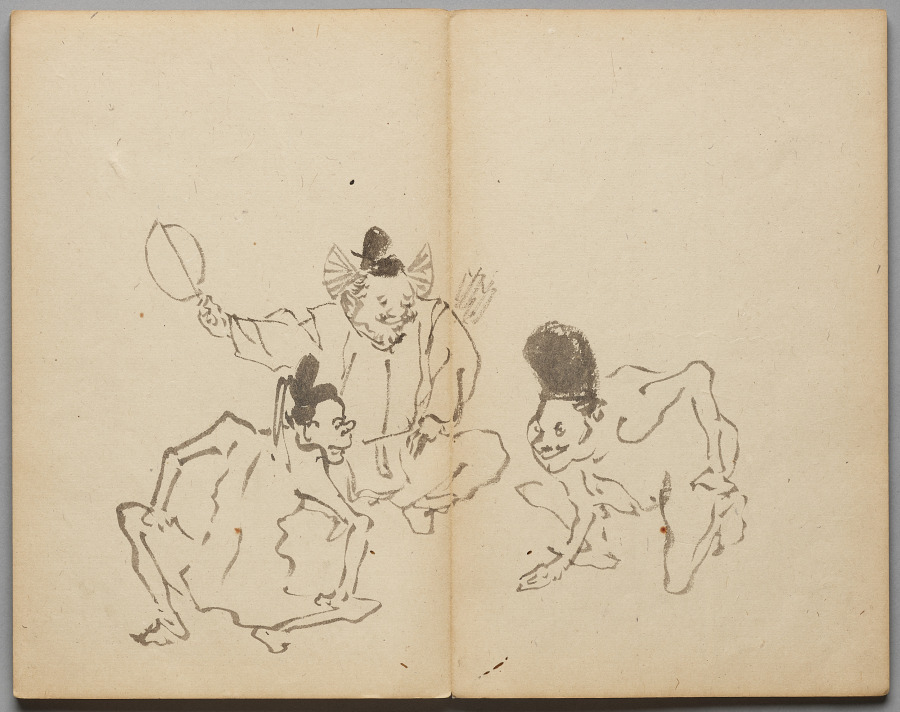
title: Wrestling Match from Sketch Album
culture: Japan, Edo period (1615–1868) to Meiji period (1868–1912)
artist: Kawanabe Kyōsai (Japanese, 1831–1889)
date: mid- to late 1800s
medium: Accordion-style book of 26 double-leaves; ink and color on paper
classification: Bound Volume